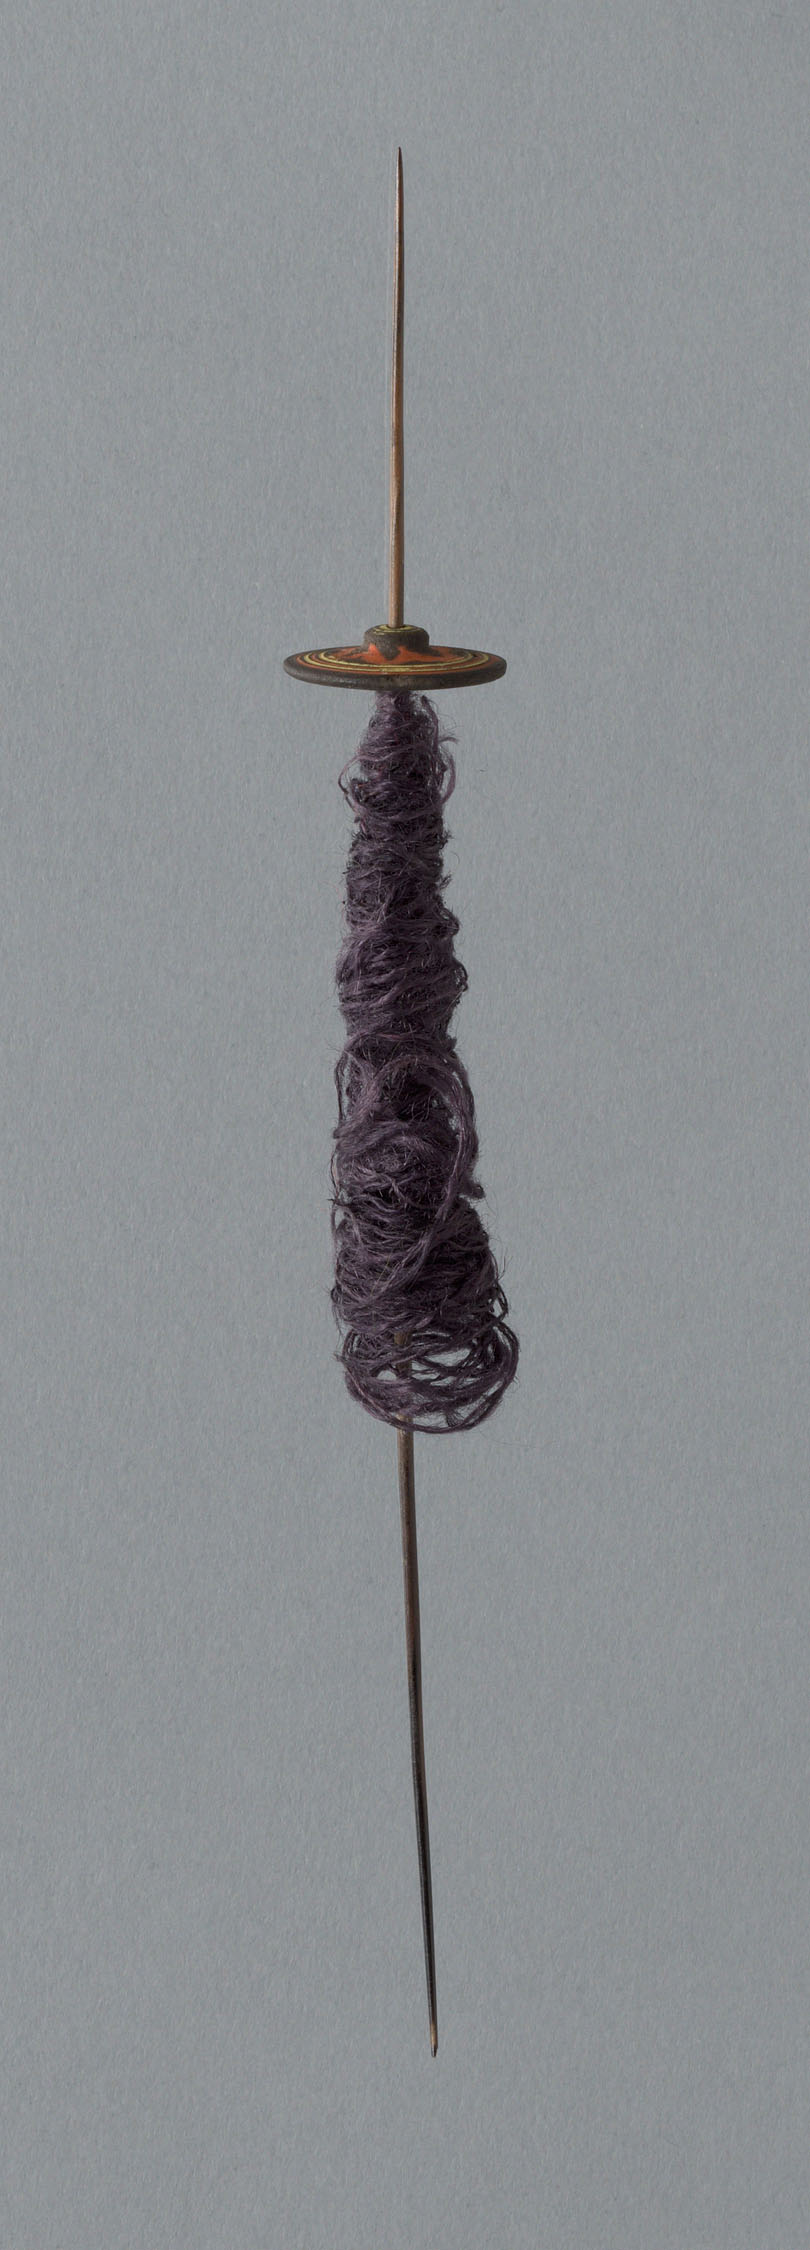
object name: non-art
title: Wooden Spindles with Ceramic Whorls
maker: Peru, Possibly central coast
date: 1000/1476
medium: Wood and ceramic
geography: Peru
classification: textile working equipment; whorls (spindle flywheels); spindles (textile working equipment); textile